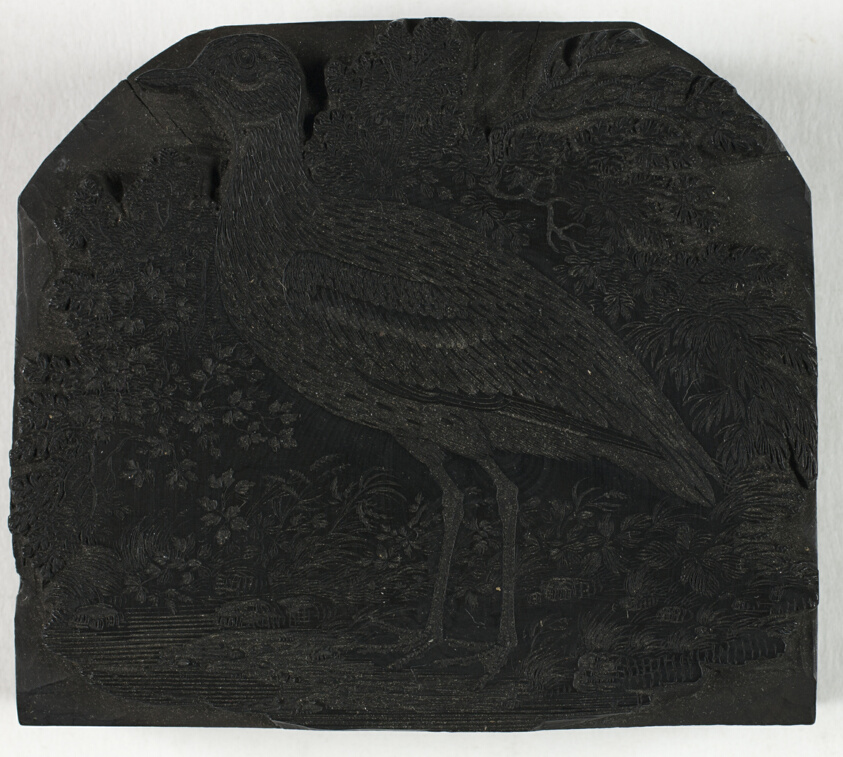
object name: Print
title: Woodblock for The Great Plover, from A History of British Birds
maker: Thomas Bewick (English, 1753-1828)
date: c. 1797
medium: Wood engraving block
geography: England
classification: wood engraving block; woodblock; matrix; prints and drawing; print